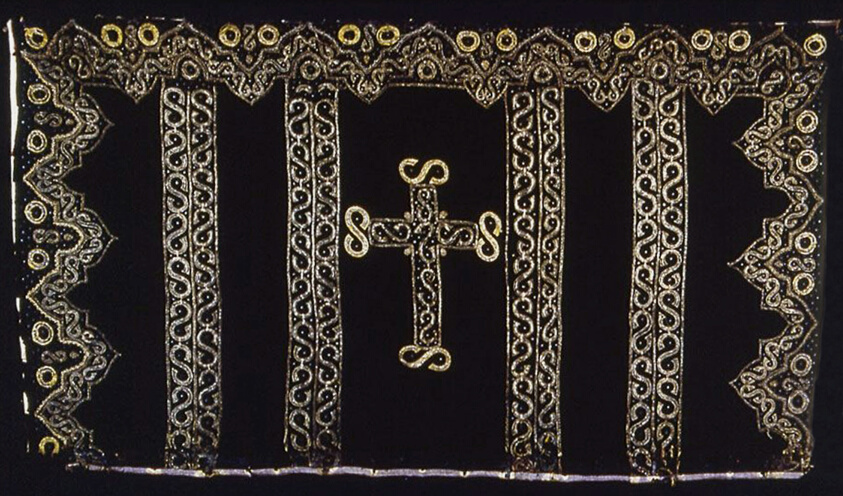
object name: Textile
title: The Stafford Altar Frontal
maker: England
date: 1620/40 (appliquéd areas: late 17th century)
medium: Silk, broken warp chevron twill weave cut solid velvet; underlaid with cotton, plain weave; appliquéd with same velvet and with silk, satin weave; underlaid with linen, plain weave; embroidered with gilt-metal strip and purl, gilt-metal-wire-wrapped linen, and gilt-metal-strip-wrapped silk in laidwork and couching; edged with gilt-metal-strip-wrapped silk, bobbin straight lace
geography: England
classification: textile; needlework (visual works); liturgical; weaving - velvet